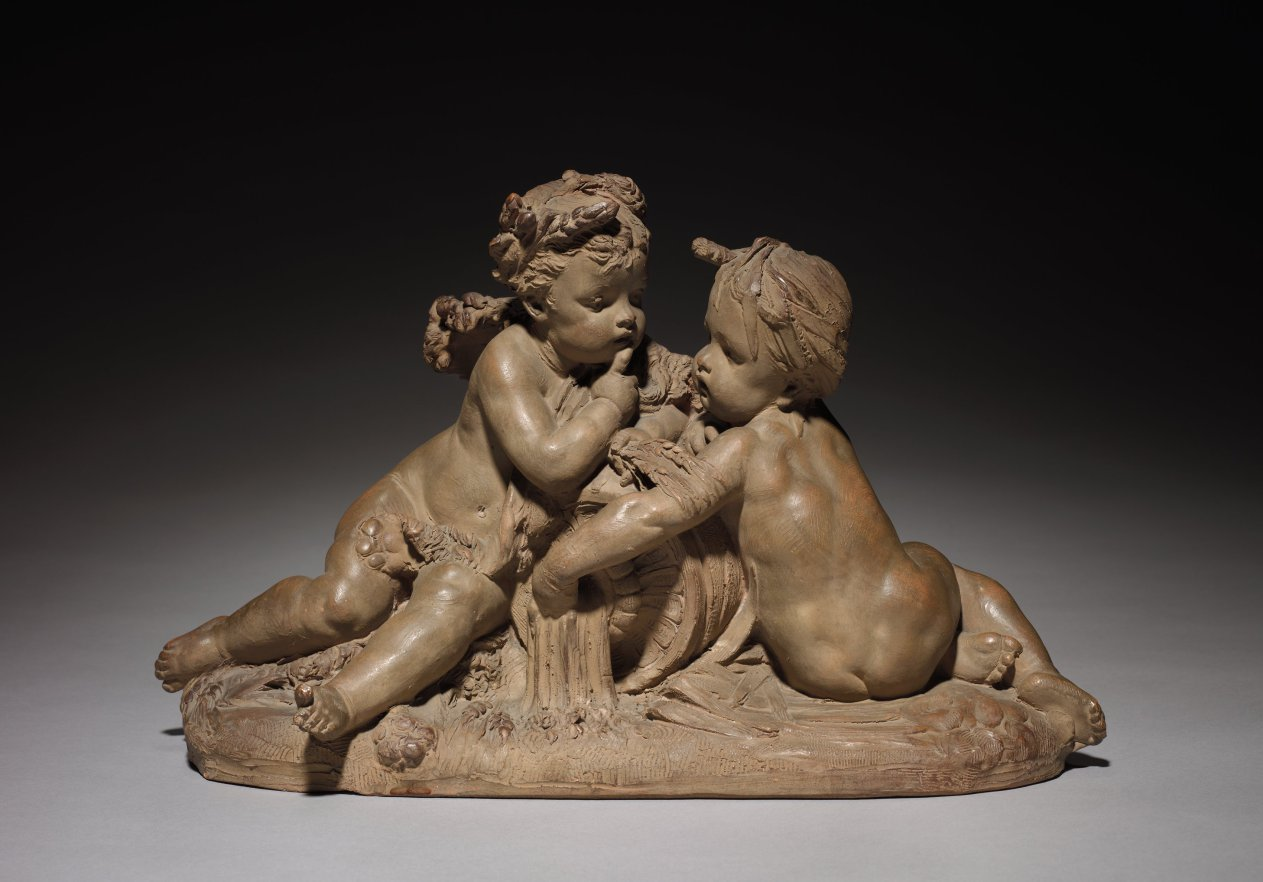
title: Putti Representing Earth and Water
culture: France, 19th century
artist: Albert-Ernest Carrier-Belleuse (French, 1824–1887)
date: 1865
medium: terracotta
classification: Sculpture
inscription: Signed near right corner: "A. Carrier (letter 'E' smeared)"; inscribed in pencil on upper surface of wooden base: "#2268" and "Henschel"; inscribed in pencil on bottom of wood base: "2268" and "Made-in-France"